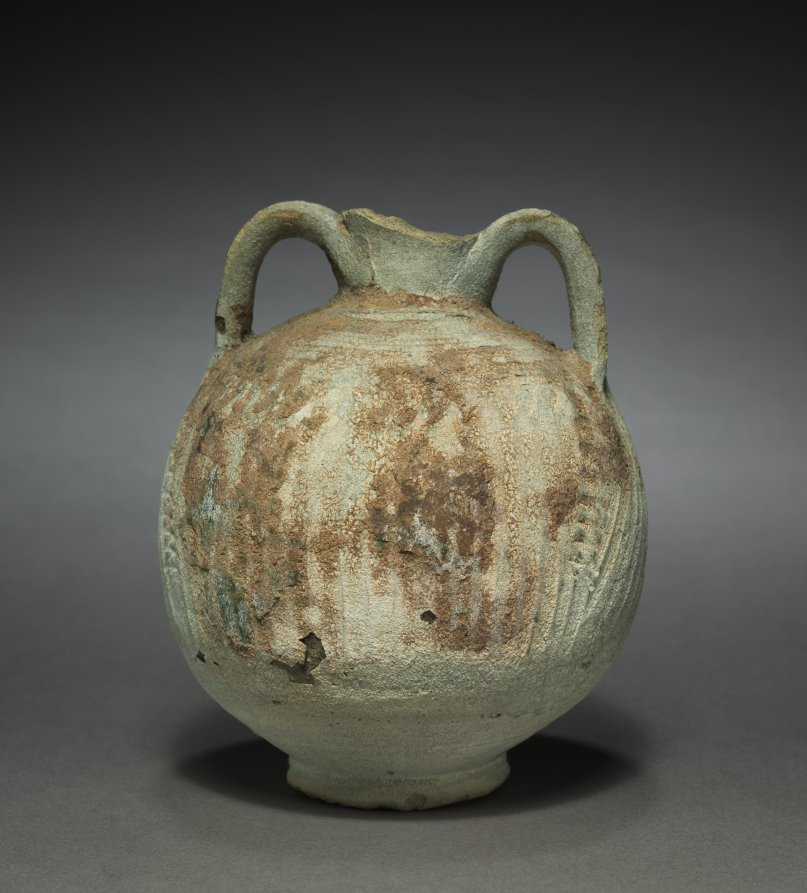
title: Jar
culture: Parthian Empire (247 BCE–224 CE)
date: 1–200 CE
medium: terracotta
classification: Ceramic